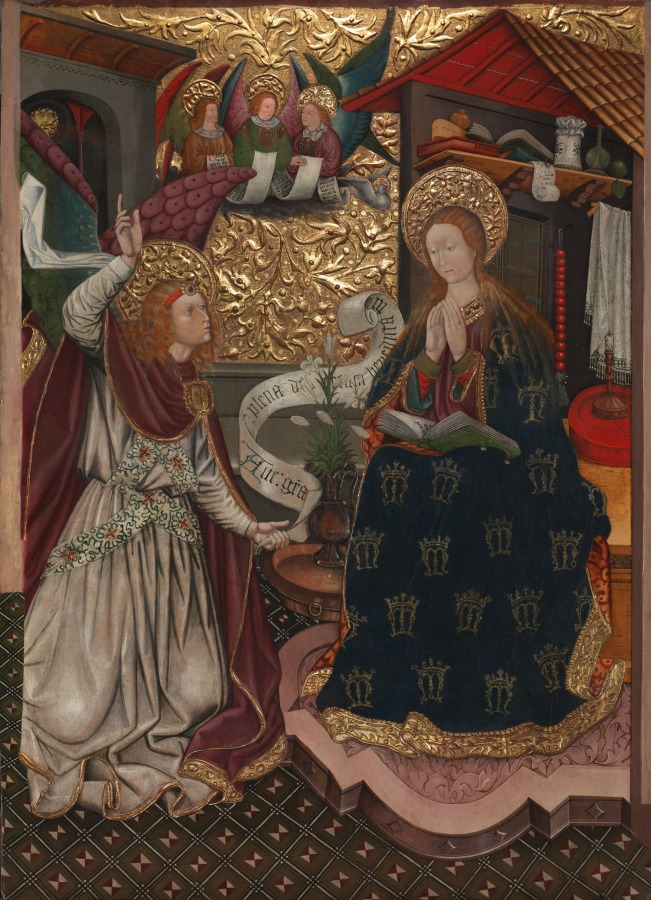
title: The Annunciation and The Nativity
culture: Spain, Catalonia, 15th century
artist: Jaume Ferrer the Younger (Spanish, Catalonia died c. 1460/70)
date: c. 1457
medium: oil, tempera, and gold on wood panel (fir)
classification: Painting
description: These paintings are believed to be the remaining components of a six-panel altarpiece. The large central panel is now preserved in Barcelona (Museu National d’Art de Catalunya). Ferrer collaborated with the painter Pere Garcia de Benavarri on this commission. Spanish works like these often feature elaborate treatment of the gold background, evident here in the exuberant raised decoration (called pastiglia) in the skies and the haloes, as well as other details. Here the Archangel Gabriel proclaims the Virgin’s destiny as the mother of Christ. The setting is an ordinary house, but simple objects have symbolic meaning. The lilies represent the Virgin’s purity; the covered jar and water carafe symbolize inviolability; the pomegranate symbolizes Christ’s resurrection, while the apple alludes to humankind’s fall from grace. The two books, closed and open, refer respectively to the Old and New Testaments: one foretelling and the other fulfilling the promise of the messiah. Both The Annunciation and The Nativity were components of a large altarpiece probably dedicated to the Virgin. Spanish works like these often feature elaborate treatment of the gold background, evident here in the exuberant raised decoration (called pastiglia) in the skies and haloes, as well as other details such as the vase of lilies in the Annunciation. The Annunciation The archangel Gabriel, gesturing toward God in a window above, proclaims the Virgin's destiny as the mother of Christ. Gabriel holds a scroll with the words from the New Testament (in Latin) "Hail Mary, full of grace, the Lord is with you." The angels in the sky hold another scroll proclaiming: "Glory to God in the highest, and peace to good people on earth". The simple objects surrounding the Virgin appear to be the furnishings of an ordinary house, but they carry symbolic meaning. The lilies represent the Virgin's purity; the covered jar and the water carafe symbolize inviolability. The towel and basin hint at ritual cleansing during Mass. The blown out candle points to the arrival of divine light in the world. The pomegranate symbolizes Christ's resurrection, while the apple alludes to humankind's fall from grace. The two books, closed and open, refer respectively to the Old and New testaments: one foretelling and the other fulfilling the promise of the Messiah.